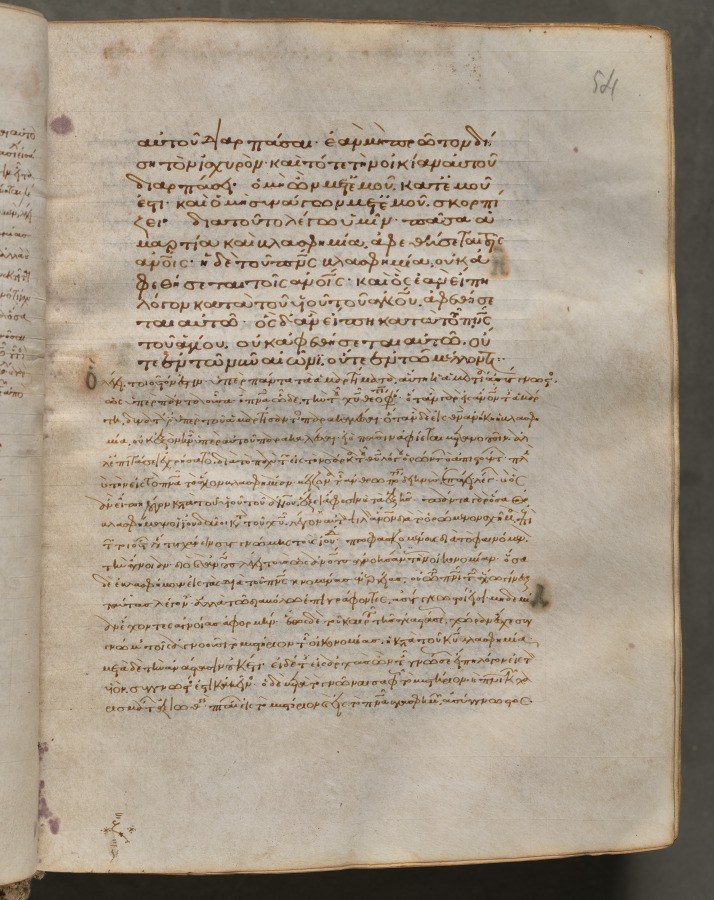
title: Text, folio 54 (recto), from a Gospel Book with Commentaries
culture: Byzantium, Constantinople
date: c. 1000–1100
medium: ink, tempera, and gold on vellum; leather binding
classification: Bound Volume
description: Each of the four gospels in this book opens on a page with brilliantly illuminated borders depicting the author of the text as well as birds-principally peacocks, symbols of the immortality of the soul-and fountains, representing the fountain of life and the salvation of the soul. This volume consists of 428 leaves with texts in Greek. Its level of sophistication suggests that it was probably written and decorated in a monastery in Constantinople.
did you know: Gospel Books were carried in procession through Byzantine churches.